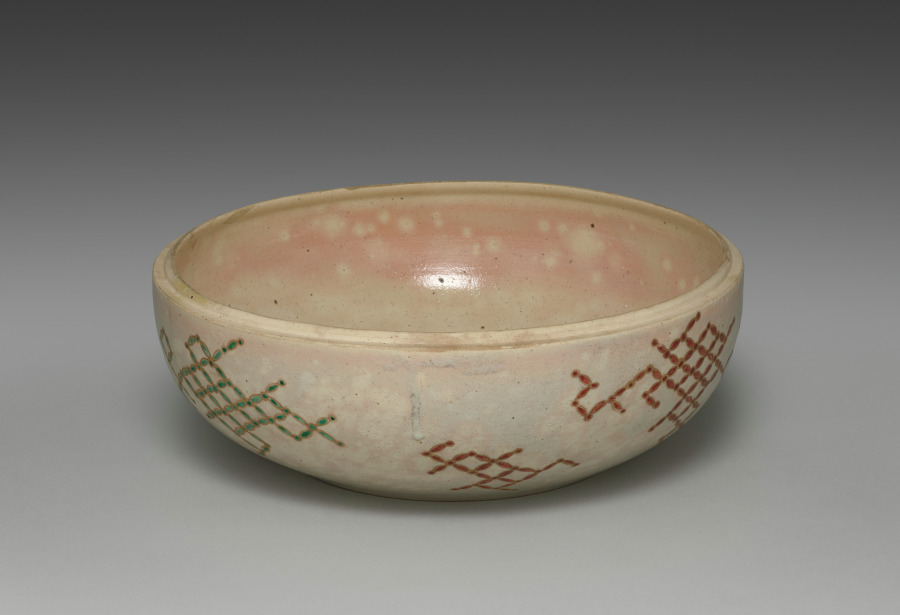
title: Bowl with Seven Treasures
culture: Japan, Edo period (1615–1868)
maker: Seifū Yohei II (Japanese, 1844–1878)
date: 1861–78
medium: Stoneware with overglaze color enamel and gold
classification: Ceramic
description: While porcelain was their primary specialization, all the members of the Seifū studio also made stoneware painted with iron oxide designs under the glaze and with color enamel and gold over the glaze. Many examples are further characterized by pink dots brought out during firing and by crackling in the glaze. Works of this type are classified as Kyoto ware, after the city where the style developed. People used the ceramics for a diversity of purposes, from everyday dining to chanoyu, or Japanese tea practice.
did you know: Overglaze enamels in red, green, and white sit within lattices of jewel-shaped gold forms scattered across the lid and base in a design known as the seven treasures.